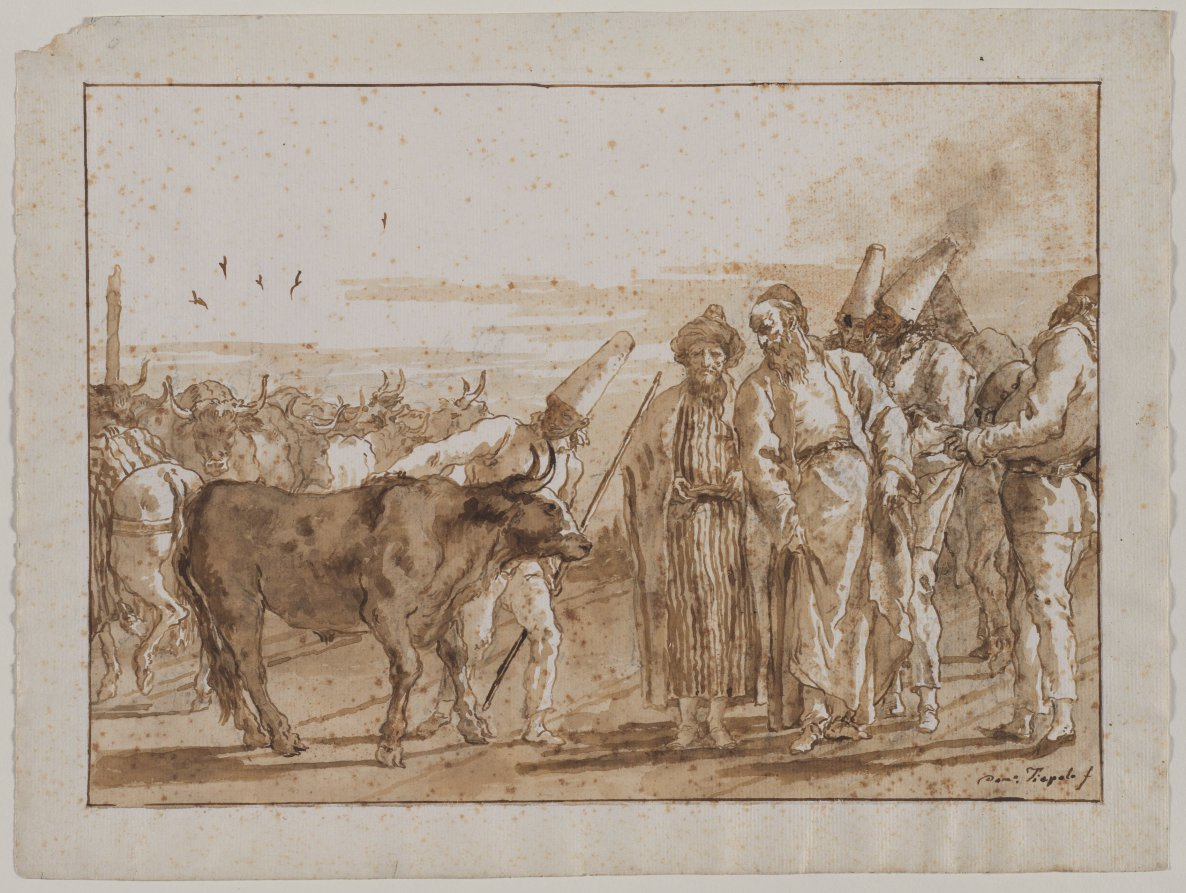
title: The Cattle Vendor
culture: Italy, 18th century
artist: Giovanni Domenico Tiepolo (Italian, 1727–1804)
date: 1790s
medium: pen and brown ink and brush and brown wash, over black chalk; framing lines in brown ink and graphite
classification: Drawing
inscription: signed, lower right, in brown ink: Dom°. Tiepolo f ; upper left, in graphite: 8 [7?] ; upper left, in graphite: o ; VERSO, upper right, in blue crayon: 5